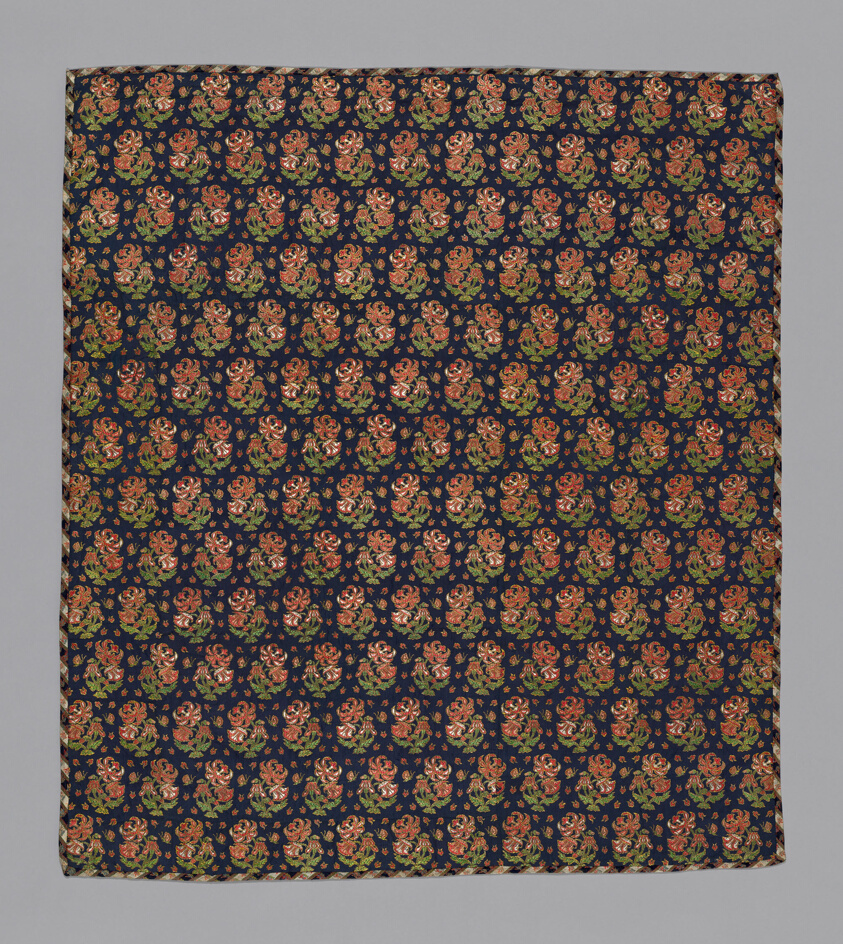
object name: Textile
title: Cover (Furnishing Fabric)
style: isfahan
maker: Iran (Persia, Isfahan)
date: 19th century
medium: Silk; printed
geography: Iran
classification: textile; weaving; furnishing textile